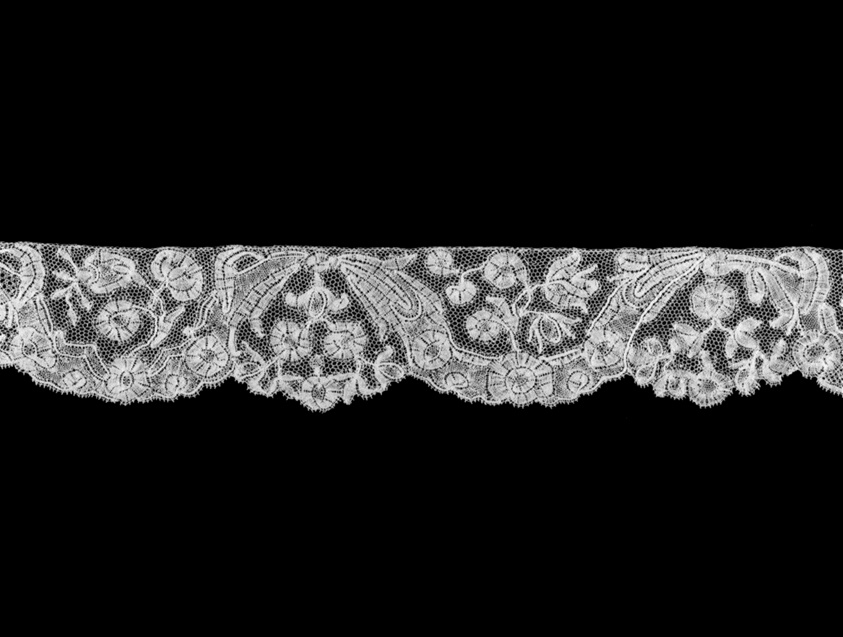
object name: Textile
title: Border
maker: Possibly England, West Country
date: 1725/75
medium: Linen, bobbin part lace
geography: England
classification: textile; lace - bobbin